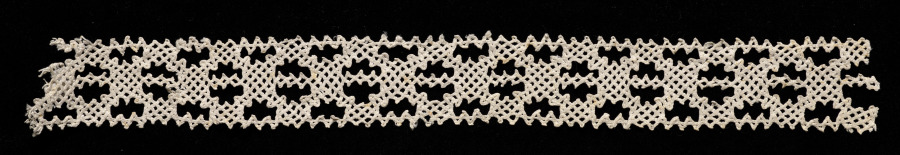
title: Lace Insertion (no selvage)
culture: Italy, Venice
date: 1540–60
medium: Bobbin lace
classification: Lace